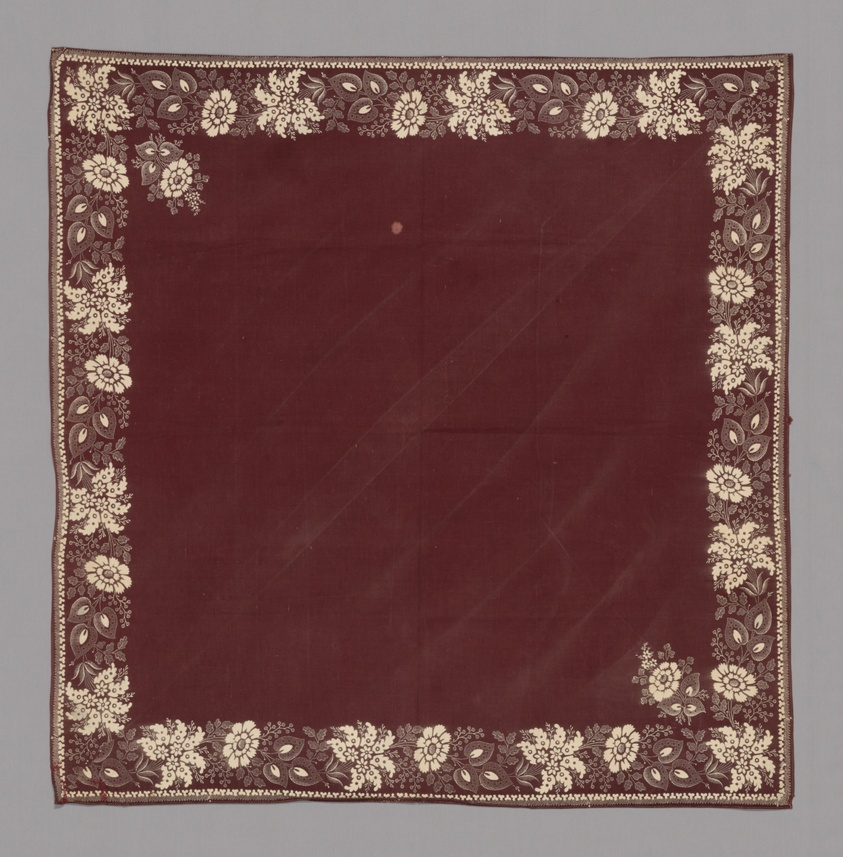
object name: Textile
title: Handkerchief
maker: France, Alsace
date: 19th century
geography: France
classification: textile; weaving - printed; accessories (object genre)